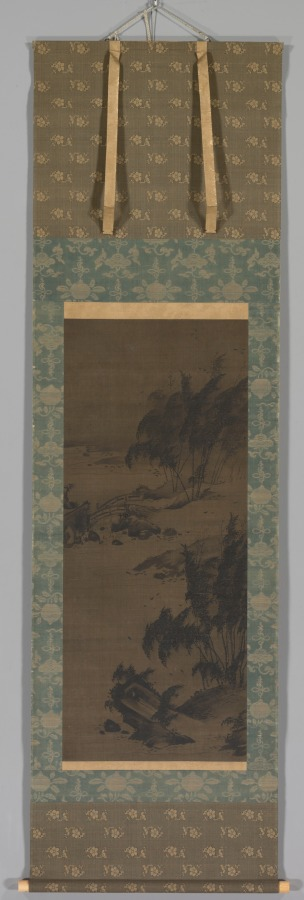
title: Bamboo in Wind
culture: Japan, Muromachi period (1392–1573)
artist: attributed to Genga (Japanese)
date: early 1500s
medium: hanging scroll; ink on silk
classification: Painting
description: East Asian paintings from China, Korea, and Japan were frequently conceived as sets of multiple images. These sets might have been composed for specific palace or temple rooms, or to portray a specific theme, such as the four seasons. Over time, the original intent of such sets is often lost through damage, changes in ownership, or a variety of other reasons. The identity of the artist can also be lost, but then, sometimes, retrieved. This pair of ink paintings has traditionally been labeled as Japanese and attributed to the 16th-century painter Genga. Since there are no seals or signature of the artist on the painting, this attribution was based on comparisons of brush style with paintings known to be by Genga. More recent study indicates that while the 16th century is an appropriate time frame for the pair, the precise cultural identity of the artist is not certain after all. The dark, eccentric shapes of the rocks and bamboo clusters and the dramatic tonal contrasts evident throughout the composition point to either Korean authorship or influence upon a Japanese painter of the period.